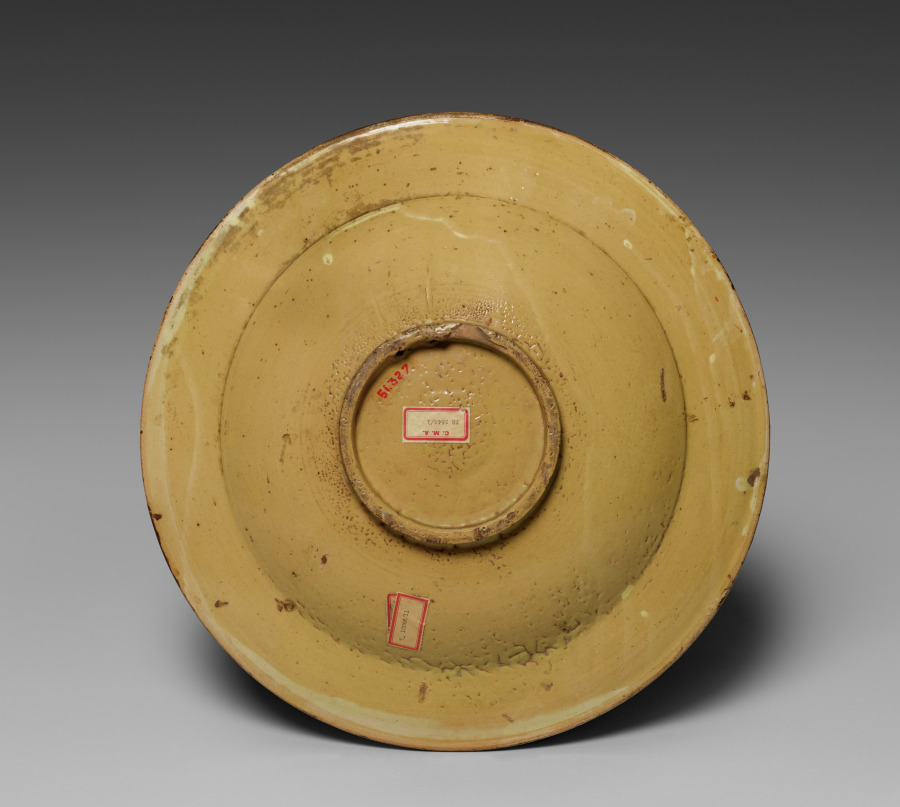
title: Plate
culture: Italy, Deruta, 16th century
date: c. 1520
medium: tin-glazed earthenware (maiolica)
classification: Ceramic